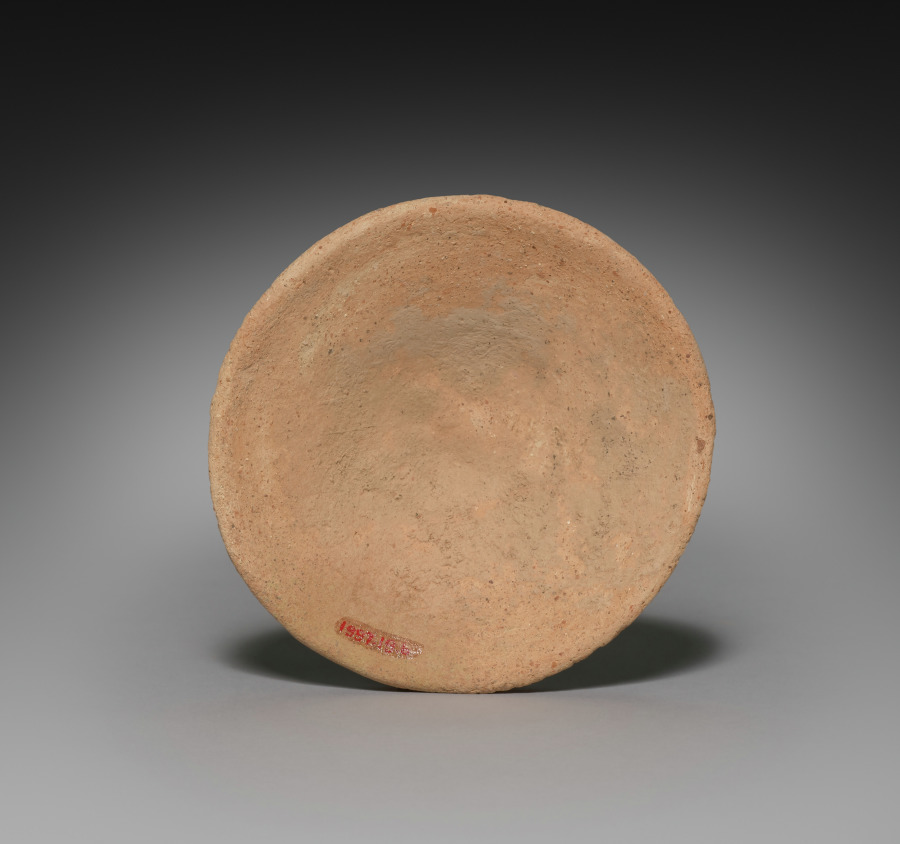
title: Covered Jar with Horn Handle (lid)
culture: Korea, Silla (57 BC-935) or Kaya (AD 42-562) period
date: 400s–500s CE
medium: red earthenware with applied red slip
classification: Ceramic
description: Early earthenware from the Three Kingdoms period (57 BCE–668) became widely utilized as agriculture and religion grew to be essential elements in sustaining society and its systems. The clay jars of different sizes and shapes on display were made for the following purposes: some were used to store harvested grains and seeds, some, especially lidded ones such as this example, to preserve cremated remains, and some to serve offerings in rituals.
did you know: Closed kilns built on hillsides became widely used for producing this type of pottery vessel in Korea during the Three Kingdoms period.